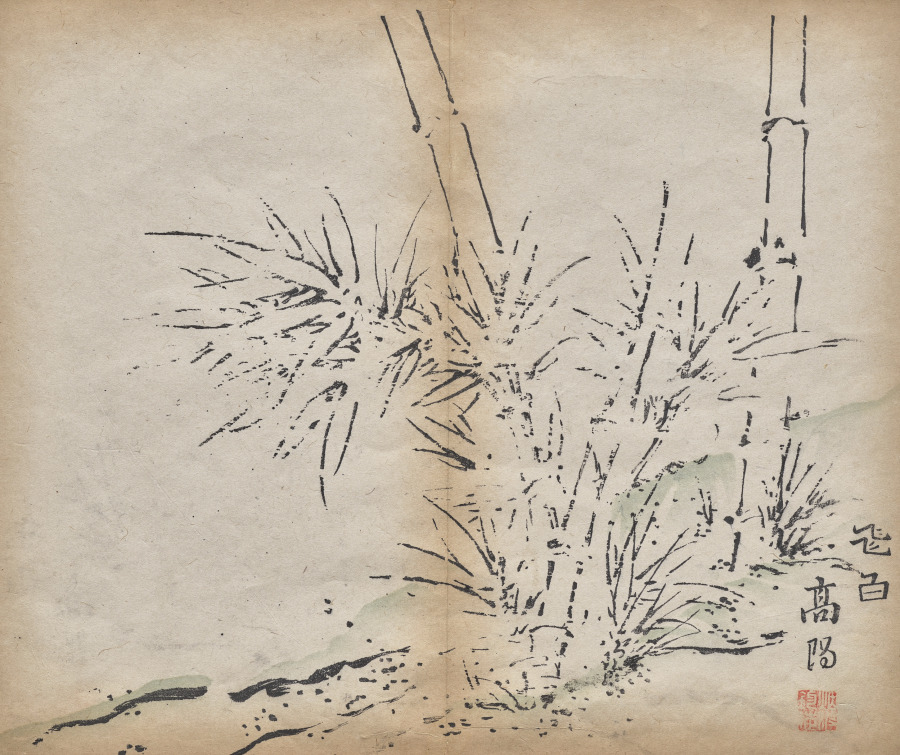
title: Bamboo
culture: China, Ming dynasty (1368–1644)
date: 1625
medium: color woodblock print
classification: Print